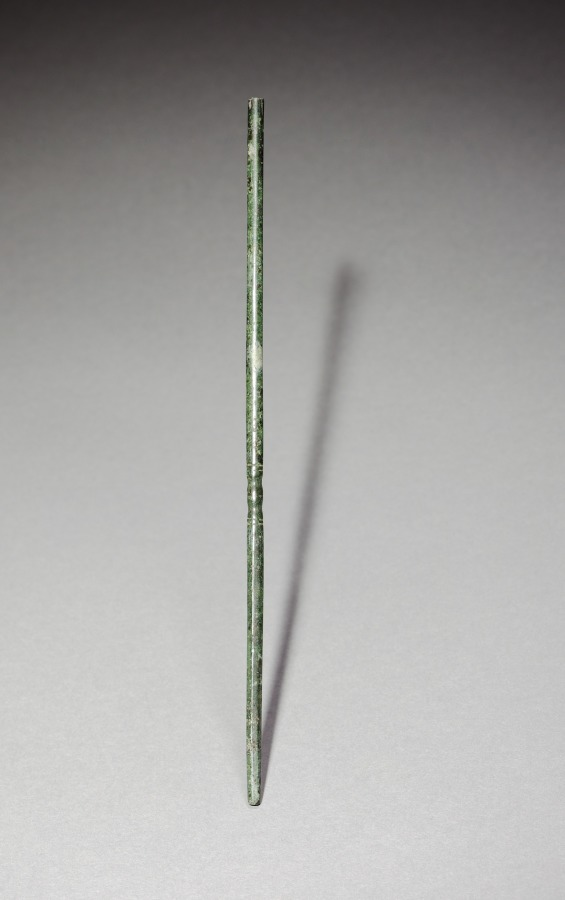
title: A Pair of Chopsticks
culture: Korea, Goryeo dynasty (918–1392)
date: 918–1392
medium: bronze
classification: Metalwork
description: In Korea, chopsticks made of metal such as brass, silver, and gold were excavated from ancient tombs and ruins dated to the 6th century at the earliest. Burial goods often include utilitarian objects such as table wares and utensils because the dead were believed to need them in the afterlife.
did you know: In contrast to the Chinese and Japanese, Koreans still prefer metal chopsticks (stainless steel and brass) to wooden ones.